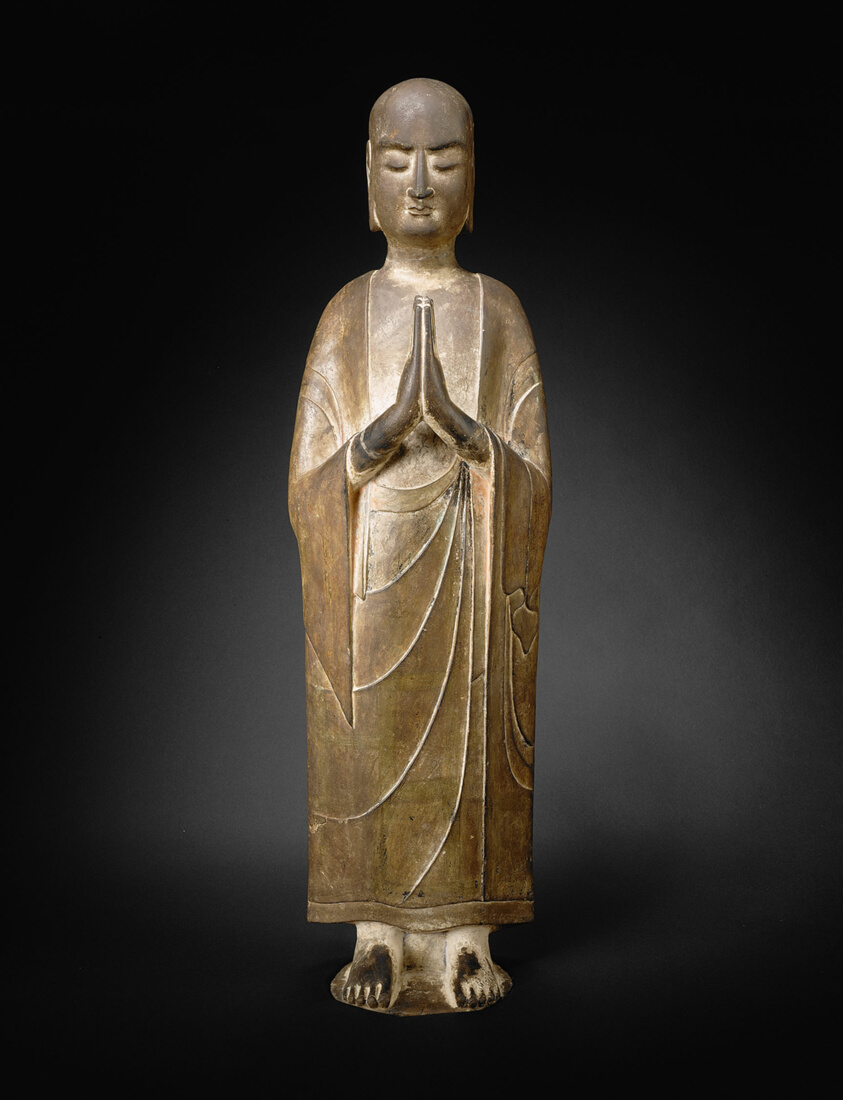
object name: Sculpture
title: Monk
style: Chinese (culture or style)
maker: China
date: Sui Dynasty (589–618 A.D.)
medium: Limestone with traces of polychromy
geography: China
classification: stone (unidentified); stone; sculpture; asian art